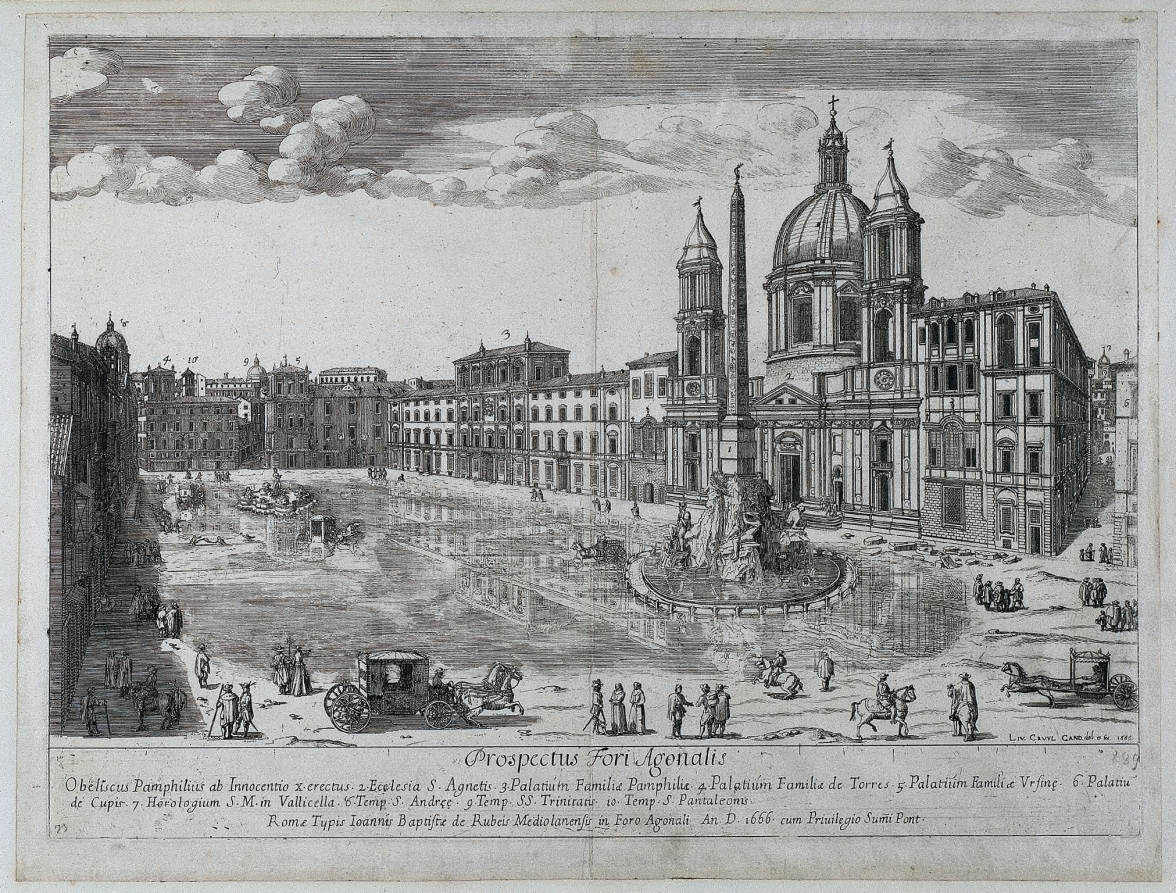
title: Piazza Navona from "Prospectus Locurum Urbis Romae Insign[ium]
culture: Flanders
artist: Lievin Cruyl (Flemish, c. 1640-c. 1720)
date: 1666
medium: etching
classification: Print